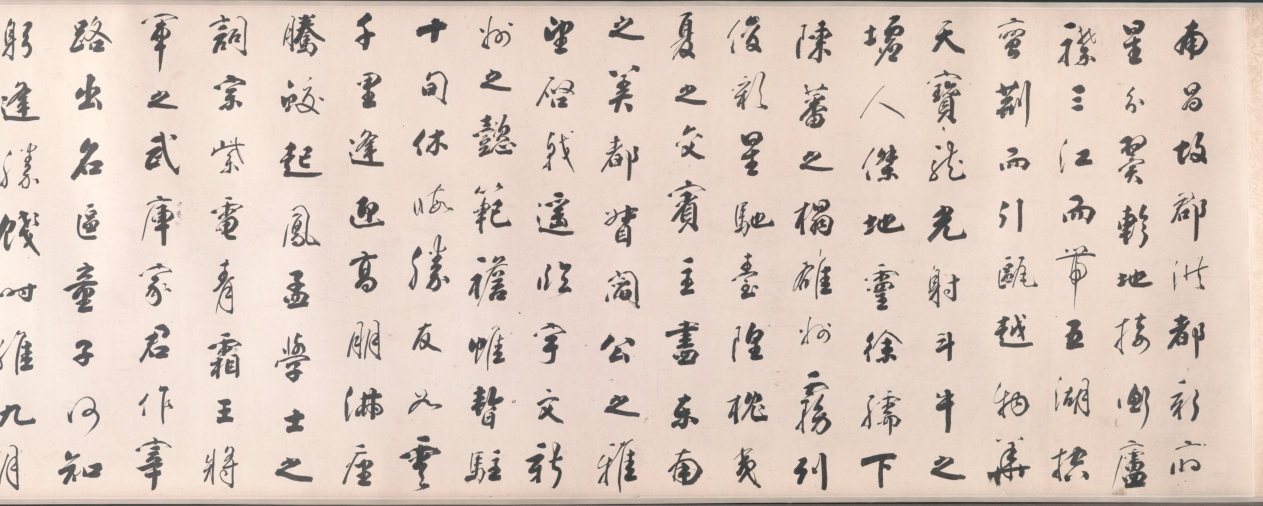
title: Calligraphy in Running Style based on Wang Bo's Essay on Tengwang Pavilion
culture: China, Changbai, Qing dynasty (1644-1911)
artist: Tiebao (Chinese, 1752–1824)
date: 1811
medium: handscroll, ink on paper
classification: Calligraphy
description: A member of the Donggo clan, Tiebao belonged to the Manchu Plain Yellow Banner army. As an official in the Qing court, he endured considerable vicissitude and his career was never smooth. Celebrated as a man of letters, he oversaw the publications of the Manchu military system as well as an anthology of poems by members of the imperial family and other Manchu dignitaries. In calligraphy, he was regarded as the equal of such eighteenth-century luminaries as Liu Yong (1720-1805) and Weng Fanggang (1733-1818). This handscroll is a work of his mature years and is exemplary of his disciplined and highly subtle approach to the art of calligraphy.